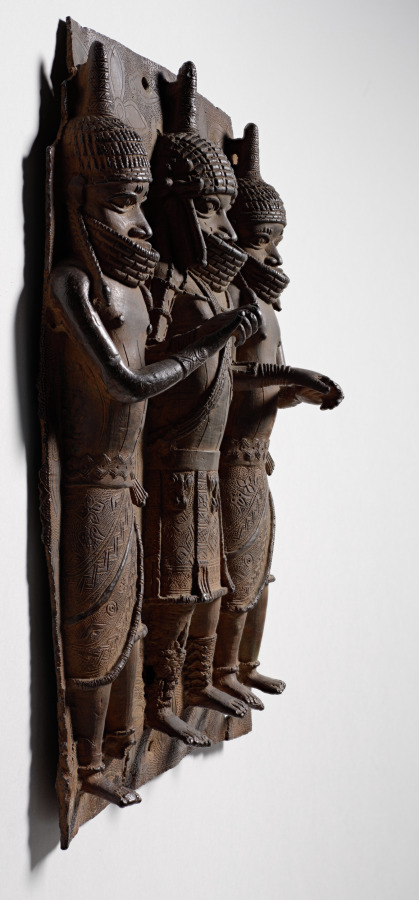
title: Plaque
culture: Nigeria, Benin Kingdom, Ẹdo peoples, members of the Igun Eronmwon (royal brasscasters) guild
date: 1500s–1600s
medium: Copper alloy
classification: Sculpture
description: Nearly 900 metal plaques once adorned the Ọba’s palace courtyard, documenting Benin’s history and customs. This one depicts two male attendants (enobore) supporting an Ọba. It uses hierarchical composition: important figures are large and centered. Everything about the Ọba is greater than his companions: their bodies, clothing, and jewelry. The flanking attendants physically support a man weighed down by heavy royal garments and responsibilities. Brasscasters skillfully cast their clasping hands projecting from the plaque. The bottom left number means the British Museum formerly owned this. It entered their collection in 1898, one year after British troops took it from a palace storeroom during the Siege of Benin.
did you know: Look at the side of this plaque. The designs on the slender edges are considered visual "signatures" of the different casters who made plaques for the Oba of Benin.